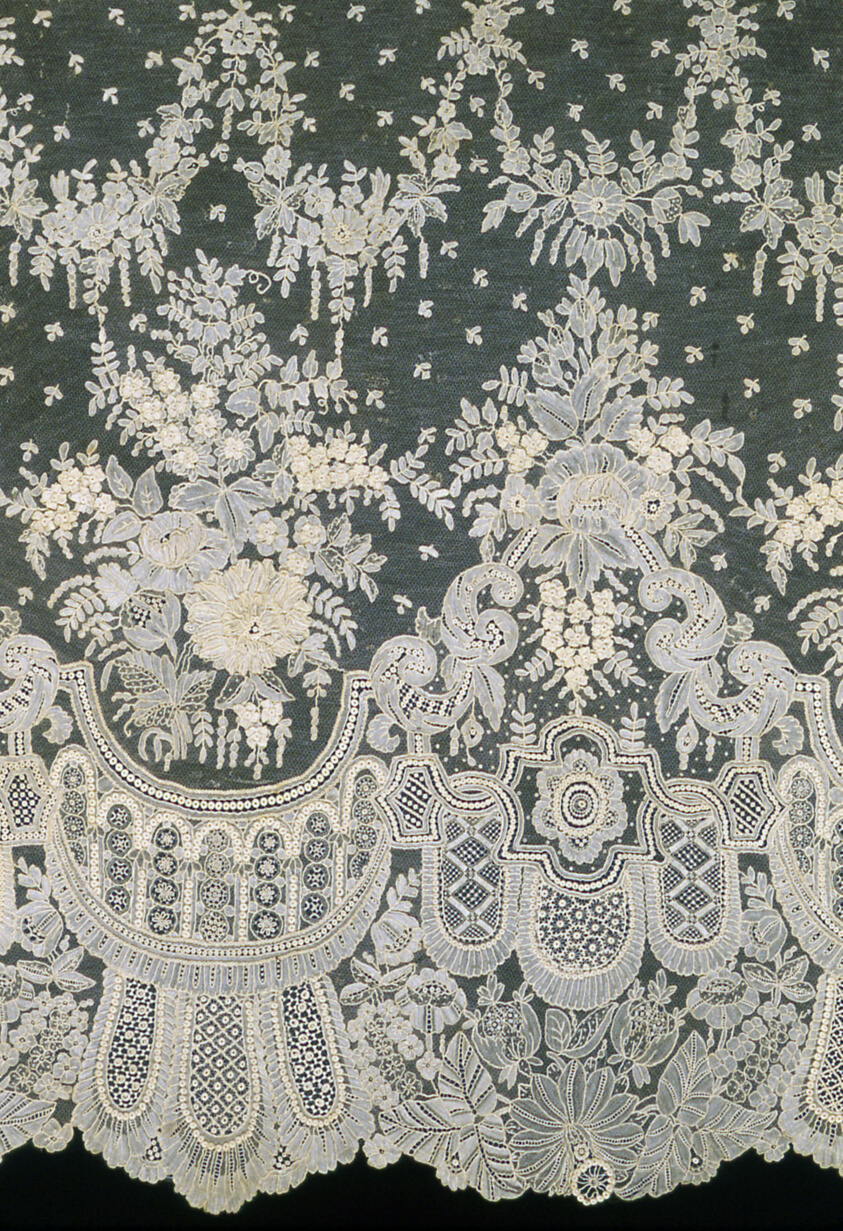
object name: Textile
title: Dress Flounce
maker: Belgium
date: 1860s (probably 1862 or 1867)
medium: Cotton, needle lace of a type known as "Point de Gaze"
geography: Belgium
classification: textile; lace - needle